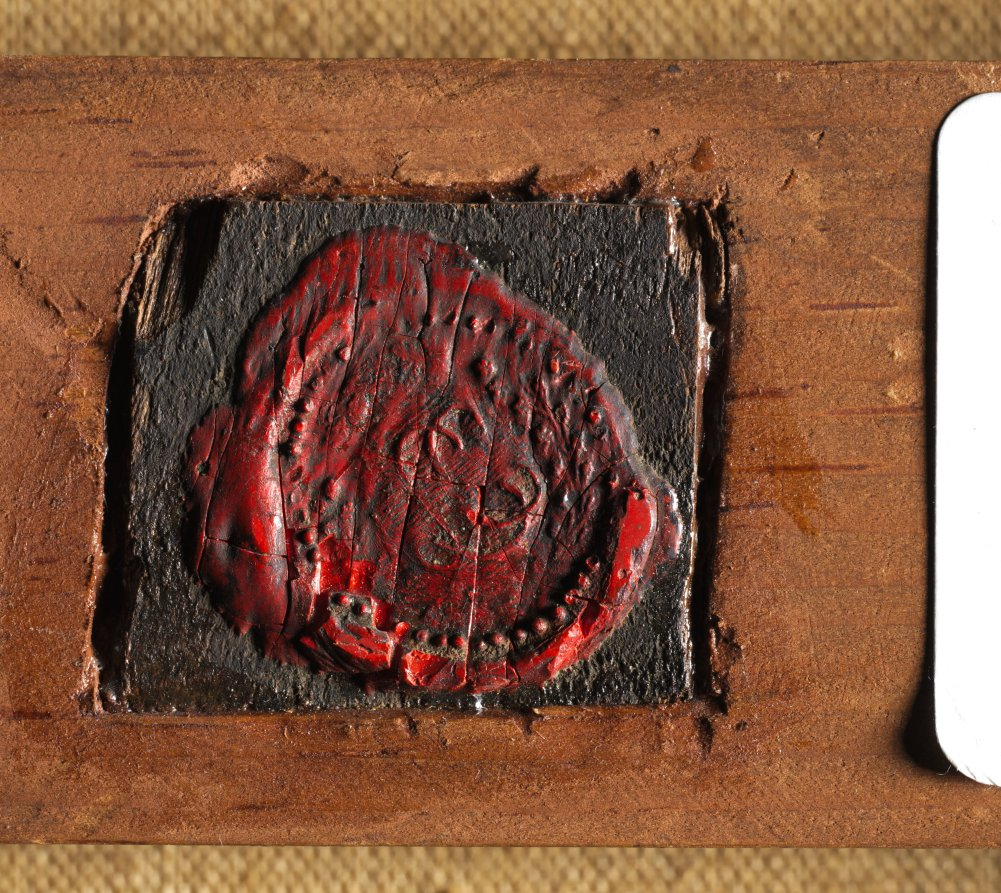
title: Head of a Young Woman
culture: France, 18th century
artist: François Boucher (French, 1703–1770)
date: early 1730s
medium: oil on canvas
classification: Painting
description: This work was catalogued as "style of Chardin" when it entered the museum's collection, and was considered a minor rococo revival work of the 1800s. In 2011, the museum asked Alastair Laing, the leading scholar of the artist Boucher, to study it. He confirmed that the painting is a rare survival from the artist's early career—one of only two known oil studies of this type by the artist.